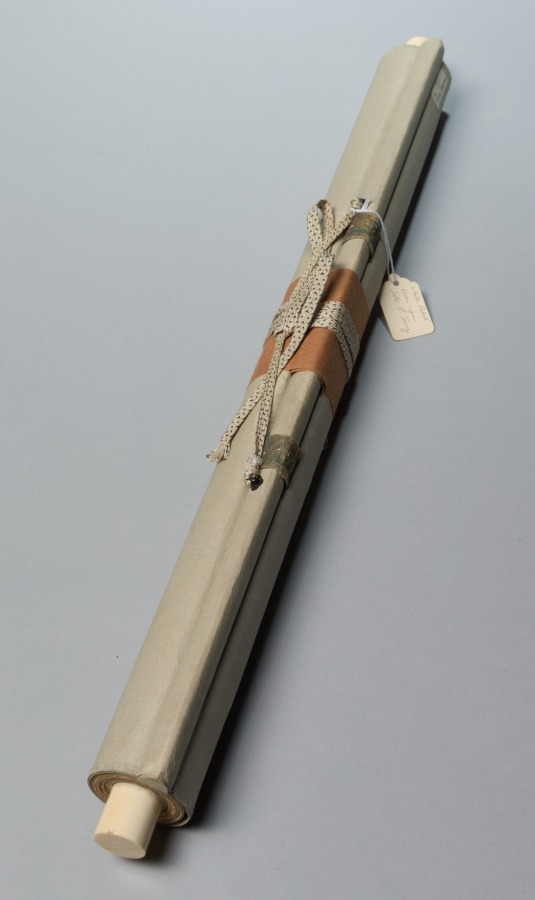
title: White-Robed Guanyin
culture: China, Southern Song dynasty (1127-1279)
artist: attributed to Zhang Yuehu (Chinese, active 1200s)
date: late 1200s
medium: Hanging scroll; ink on paper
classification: Painting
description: The figure here sits on a rocky elevation representing Potalaka in the Southern Sea, Avalokitesvara’s island home. A vase with a bamboo sprig holds pure water, the nectar of life. Bamboo shines through the figure’s halo, a way of seeing the illusionary world through the Buddhist truth. Avalokitesvara (Guanyin in Chinese), the bodhisattva of compassion, was integrated into the Chan Buddhist canon of venerated beings. In this context, the bodhisattva is often depicted in its female manifestation as the White-Robed Guanyin. The worship of the feminine White-Robed Guanyin has its origins on Mount Tianzhu in Hangzhou, where Qian Liu (852–932), ruler of the Wuyue kingdom, established the Upper Tianzhu Monastery to venerate her image.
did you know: As an artist, Zhang Yuehu was better known in Japan than in his own country.